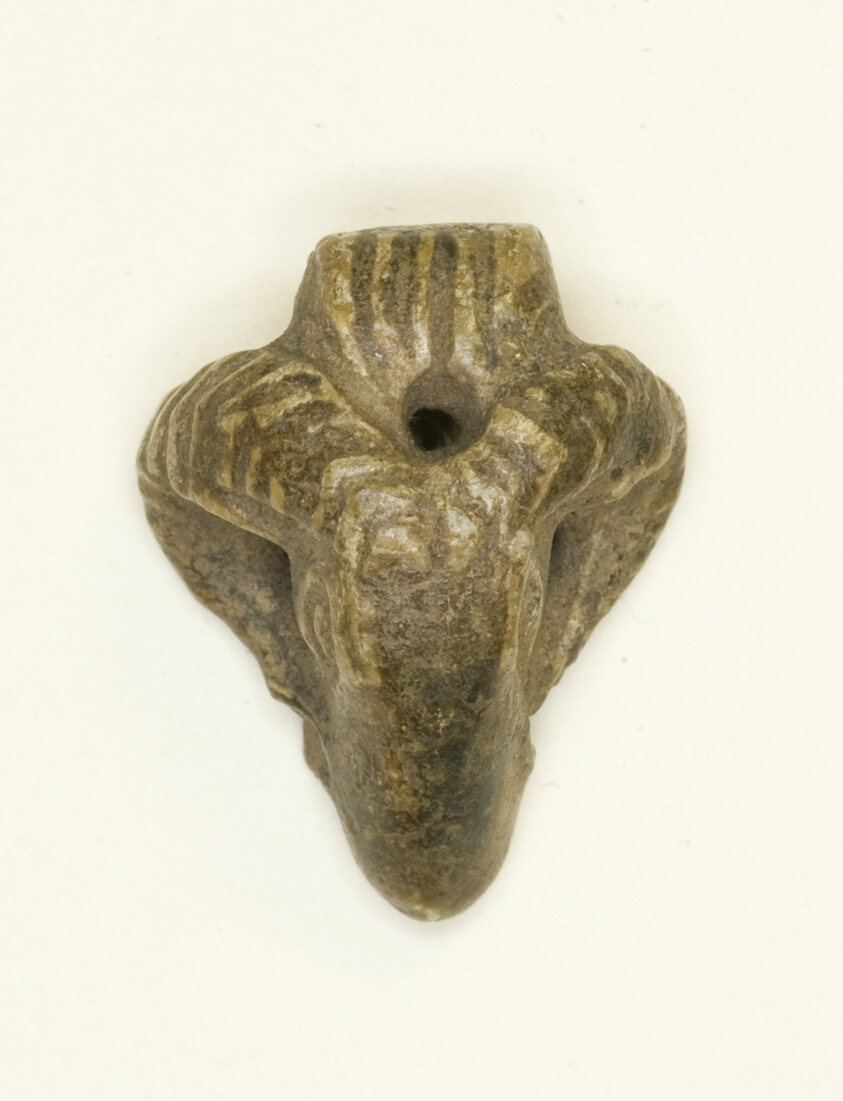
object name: Costume and Accessories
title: Amulet of a Ram's Head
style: eighteenth dynasty, new kingdom, egyptian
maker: Egyptian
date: New Kingdom–Third Intermediate Period (about 1550–664 BCE)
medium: Steatite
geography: Egypt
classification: amulet; jewelry; stone; ancient art; costume